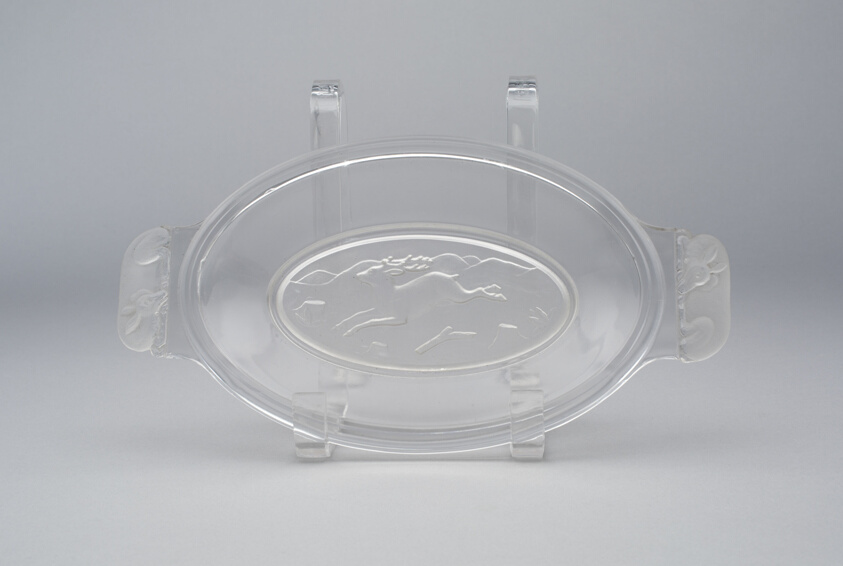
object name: Glass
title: "Westward Ho!/Pioneer" pattern platter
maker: Gillinder and Sons, 1861–c. 1930; Philadelphia or Greenbsburg, Pennsylvania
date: c. 1876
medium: Glass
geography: Pennsylvania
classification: vessel for serving food; glass; american decorative arts; american arts; decorative arts